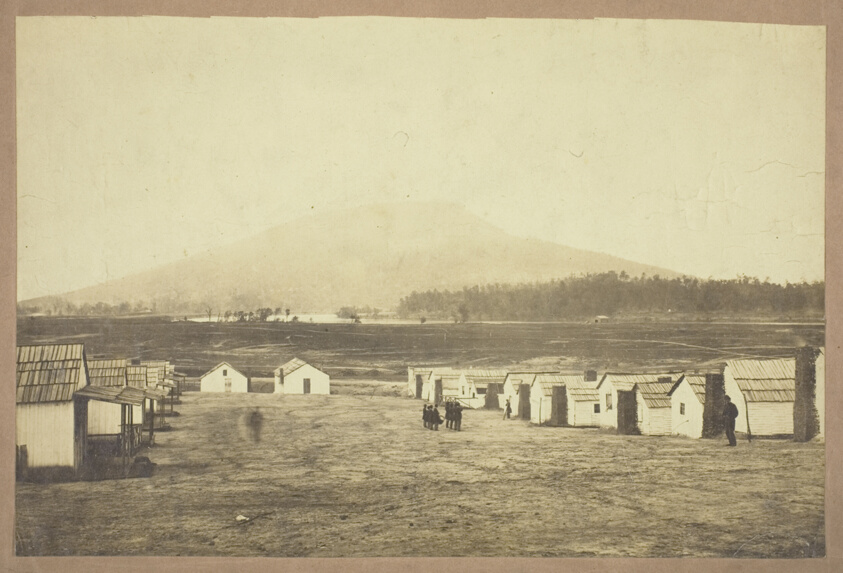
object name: Photograph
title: Untitled (Army camp, perhaps from the Battle of Lookout Mountain, Chattanooga, Tennessee)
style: 19th century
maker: Charles Peck (American, 1827–1900)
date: c. 1863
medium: Albumen print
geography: United States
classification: albumen silver print; photographic process; photography; photograph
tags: landscapes, photography